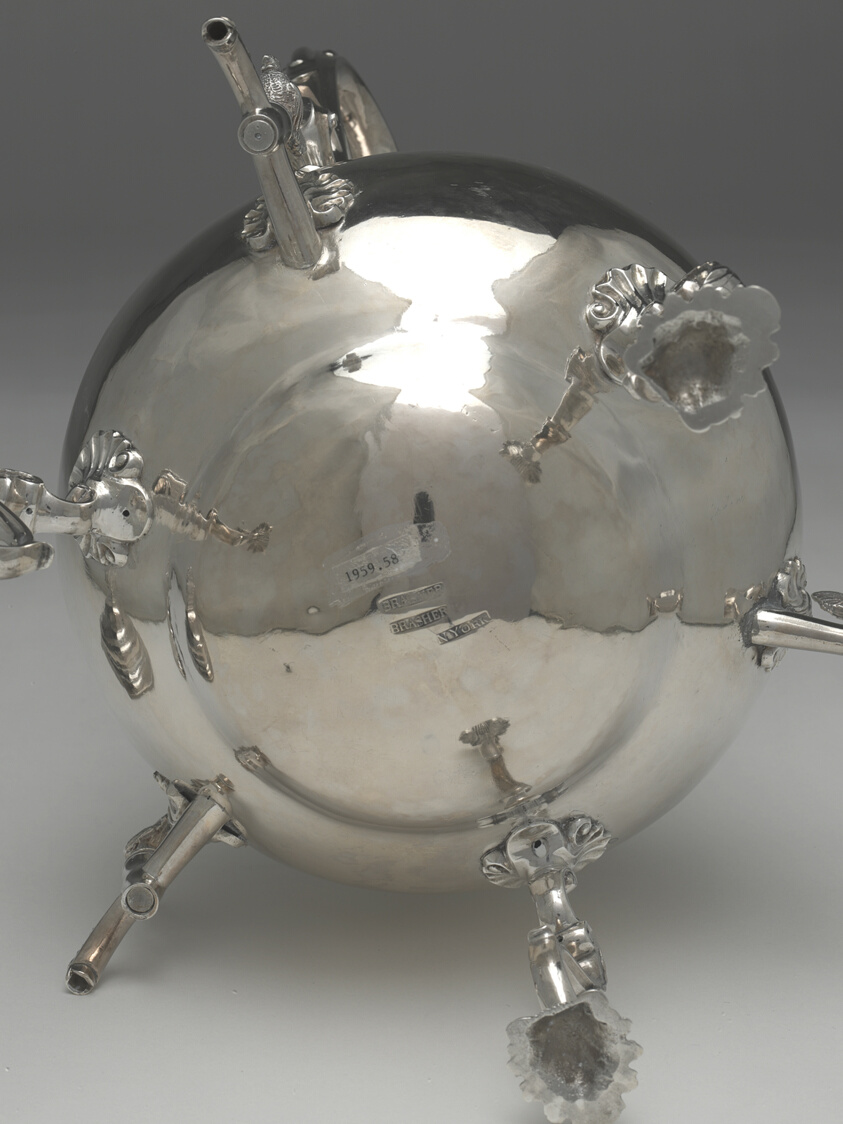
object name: Metalwork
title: Urn with Cover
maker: Ephraim Brasher; American, 1744–1810; New York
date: c. 1770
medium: Silver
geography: New York City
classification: vessel for serving drinks; silver; american decorative arts; american arts; decorative arts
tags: dining, drinking